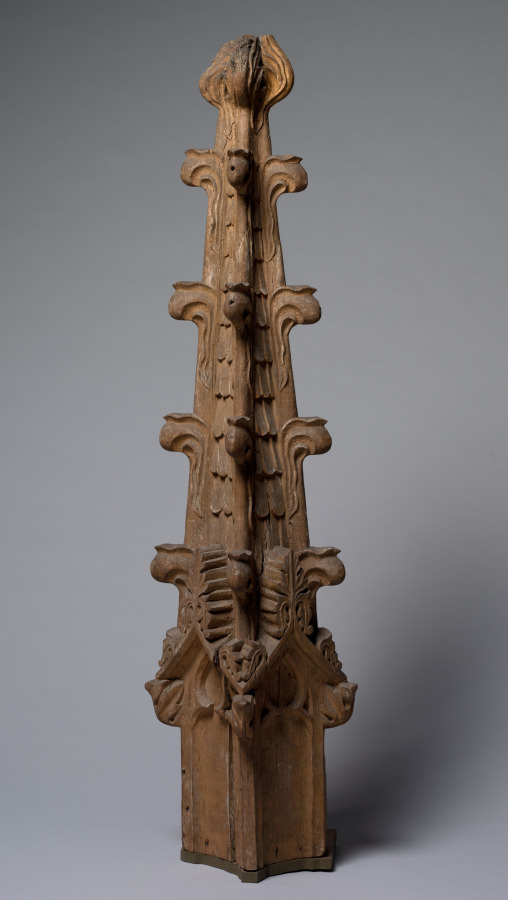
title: Pinnacle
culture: France, 15th century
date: 1400s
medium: oak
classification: Furniture and woodwork